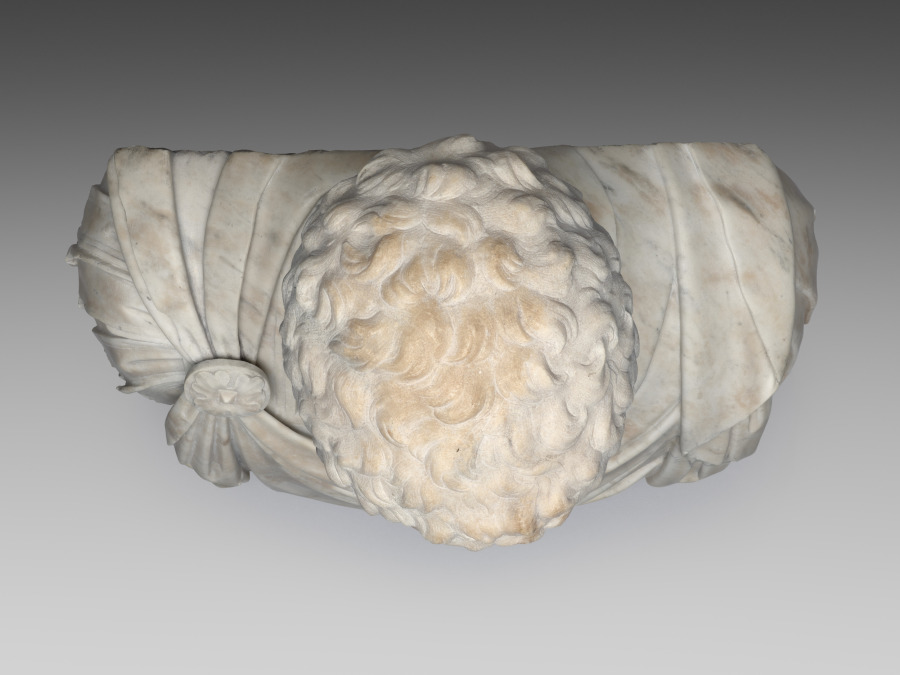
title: Bust of a Roman General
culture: Italy, 16th century or later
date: 1500s or later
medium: marble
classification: Sculpture